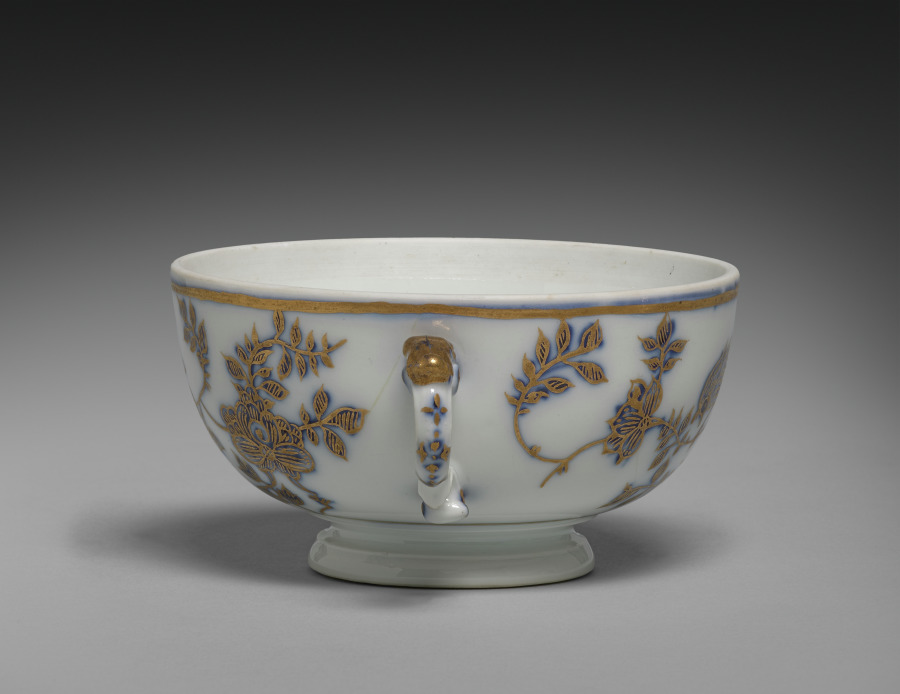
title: Broth Bowl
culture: Germany, Meissen, 18th century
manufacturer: Meissen Porcelain Factory (German, est. c. 1710)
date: 1730–40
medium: gilt porcelain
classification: Ceramic